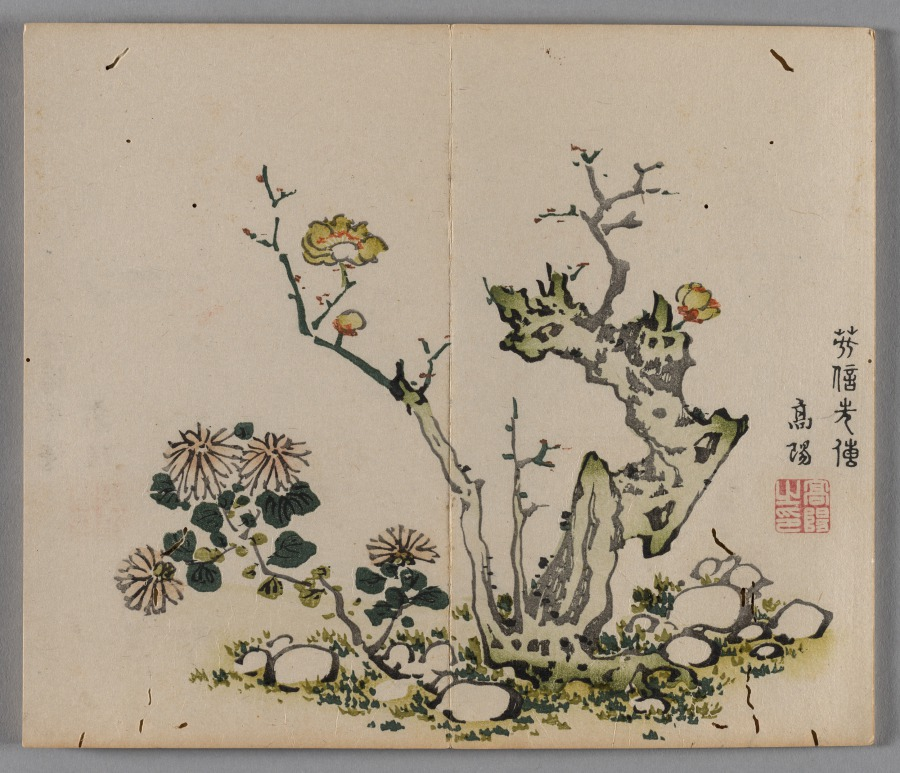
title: Ten Bamboo Studio Painting and Calligraphy Handbook (Shizhuzhai shuhua pu): Plum Blossoms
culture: China, Qing dynasty (1644-1911)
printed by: Hu Zhengyan (Chinese, c. 1584–1674)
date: 1633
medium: Woodblock-printed book; ink and colors on paper; first edition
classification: Print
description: Color printing reached a level of perfection in the early 1600s, as seen in this Ten Bamboo Studio Collection of Calligraphy and Painting and the Mustard Seed Garden Manual of Painting (printed 1679 and 1701). The painterly quality, precision in registering (aligning) the woodblocks, and harmonious colors made them the most successful color print editions in Chinese history. Both editions were printed and compiled in Nanjing, spread nationwide, and had a great impact on the arts in Japan and Korea.